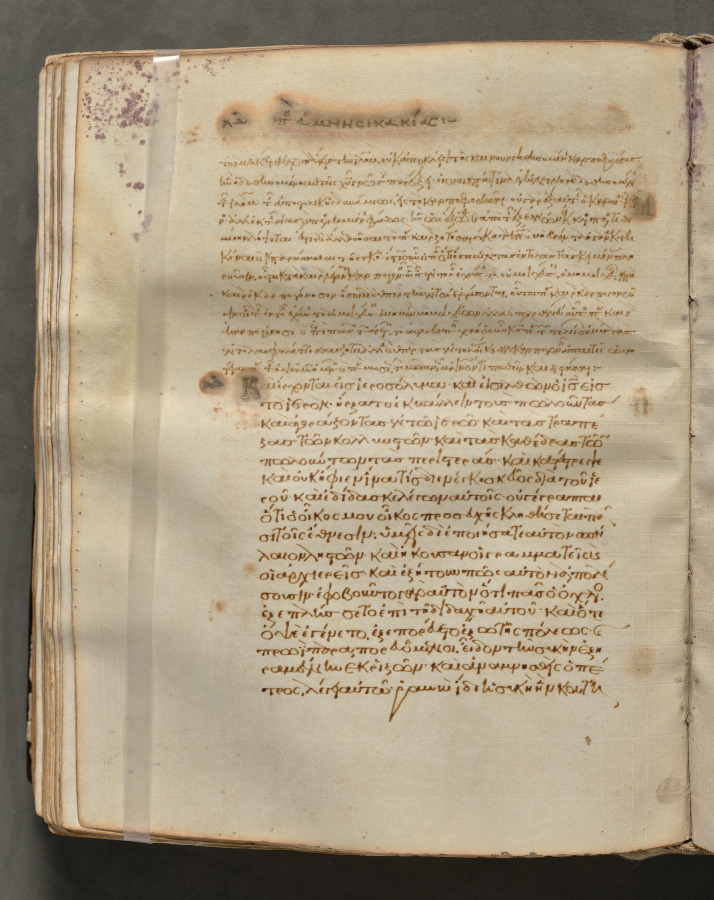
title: Text, folio 174 (verso), from a Gospel Book with Commentaries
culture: Byzantium, Constantinople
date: c. 1000–1100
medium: ink, tempera, and gold on vellum; leather binding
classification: Bound Volume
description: Each of the four gospels in this book opens on a page with brilliantly illuminated borders depicting the author of the text as well as birds-principally peacocks, symbols of the immortality of the soul-and fountains, representing the fountain of life and the salvation of the soul. This volume consists of 428 leaves with texts in Greek. Its level of sophistication suggests that it was probably written and decorated in a monastery in Constantinople.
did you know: Gospel Books were carried in procession through Byzantine churches.